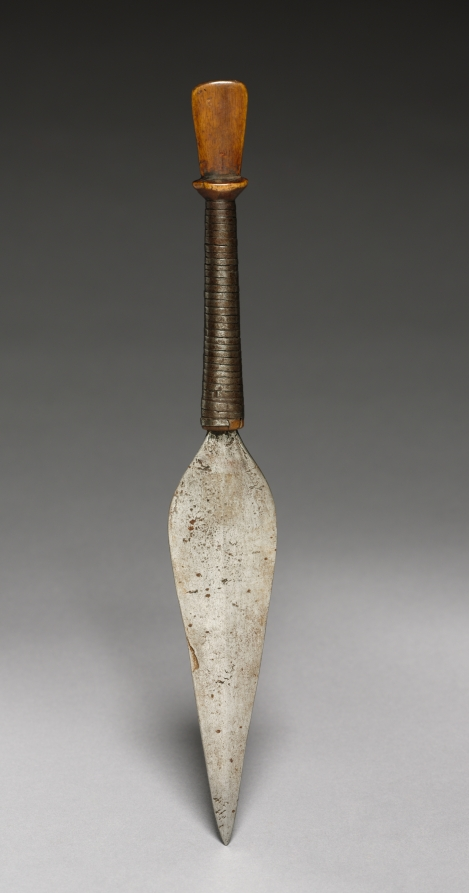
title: Dagger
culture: Central Africa, Democratic Republic of the Congo, Bakonje, 20th century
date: 1900s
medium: iron and wood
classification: Arms and Armor